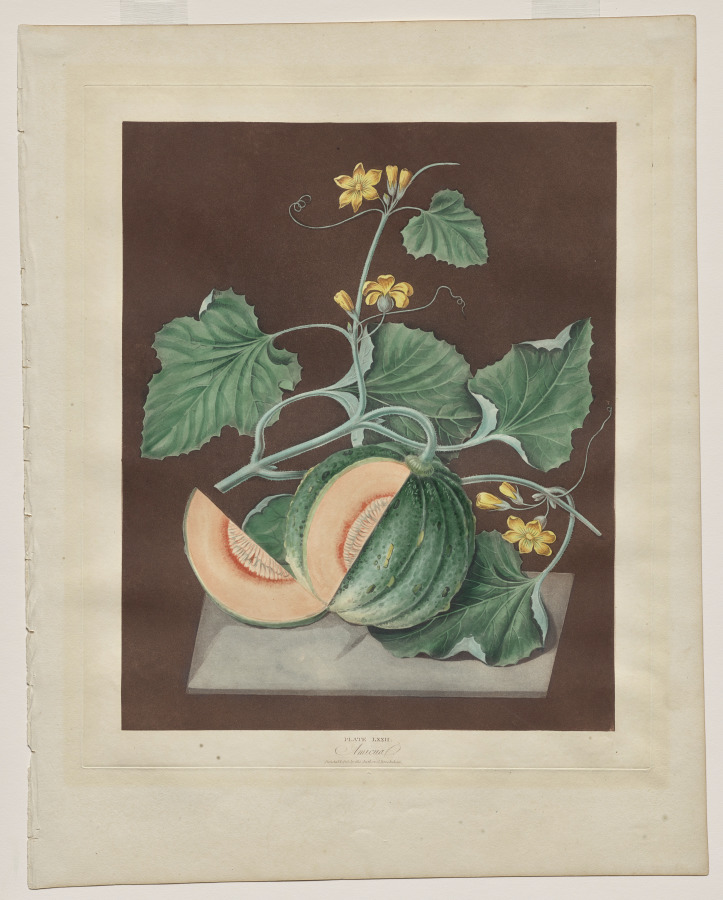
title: Pomona Britannica: No. 72 - Amicua (Melon)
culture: England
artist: George Brookshaw (British, 1751–1823)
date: published 1812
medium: aquatint and stipple engraving printed in color and hand colored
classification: Print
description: This color aquatint etching is one plate from George Brookshaw’s 1812 illustrated volume Pomona Britannica. Named after the Roman goddess of fruit trees, gardens, and orchards, Brookshaw intended the volume to be the English “country gentleman’s” guide to the science of classifying and identifying fruits (pomology). Many of Brookshaw’s models came from the Royal Gardens at Hampton Court and Kensington Gardens. Each print featured one fruit, often life-size, including detailed depictions of its flower and leaves. Printed in color with hand-painted highlights, this and other illustrated botanicals formed an essential part of the cultured English library in the early 19th century.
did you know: Originally from North Africa, melons are recorded in England as early as the 1500s.